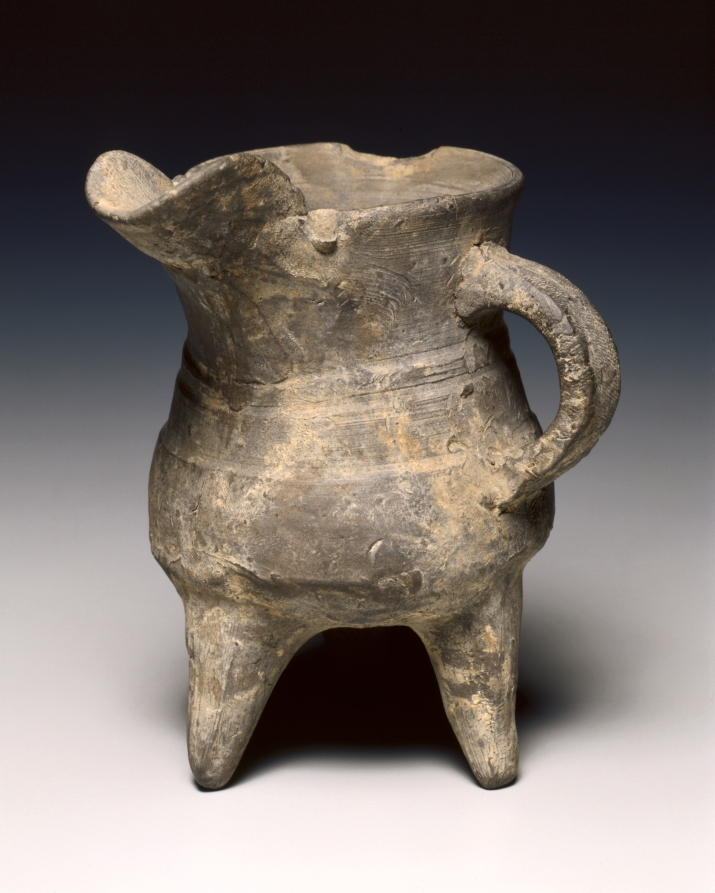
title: Wine Warmer (Jue)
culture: China, Shang dynasty (c. 1600–c. 1046 BCE), Anyang phase (c. 1250–1046 BCE)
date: c. 1300–1023 BCE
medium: pottery, tripod vessel with loop handle and rudimentary bowstring decoration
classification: Ceramic